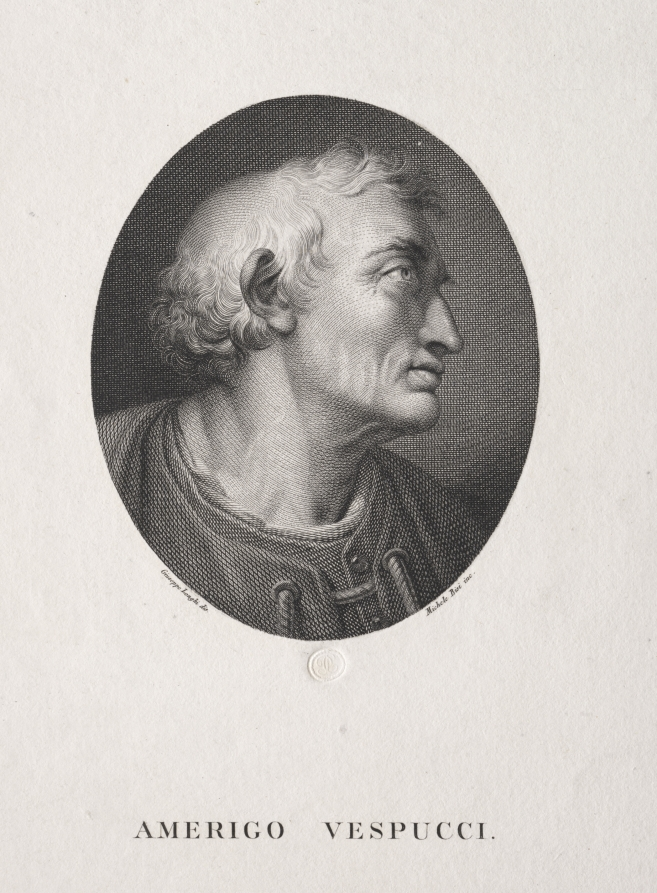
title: Portrait of Amerigo Vespucci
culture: Italy, 19th century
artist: Michele Bisi (Italian, c. 1788–1874)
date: 1800s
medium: engraving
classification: Print